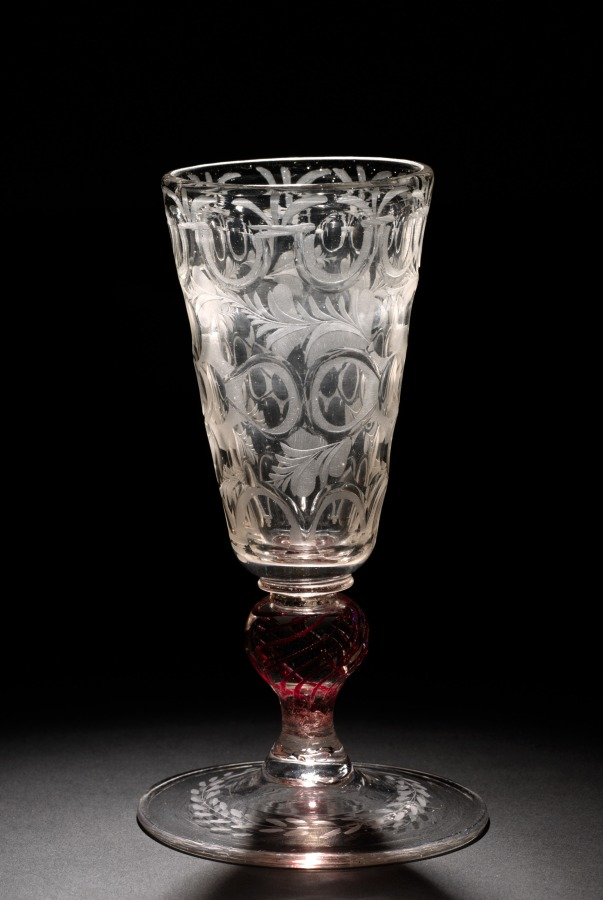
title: Flute-Shaped Drinking Vessel (Pokal)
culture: Bohemia, early 18th century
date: early 1700s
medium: glass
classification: Glass